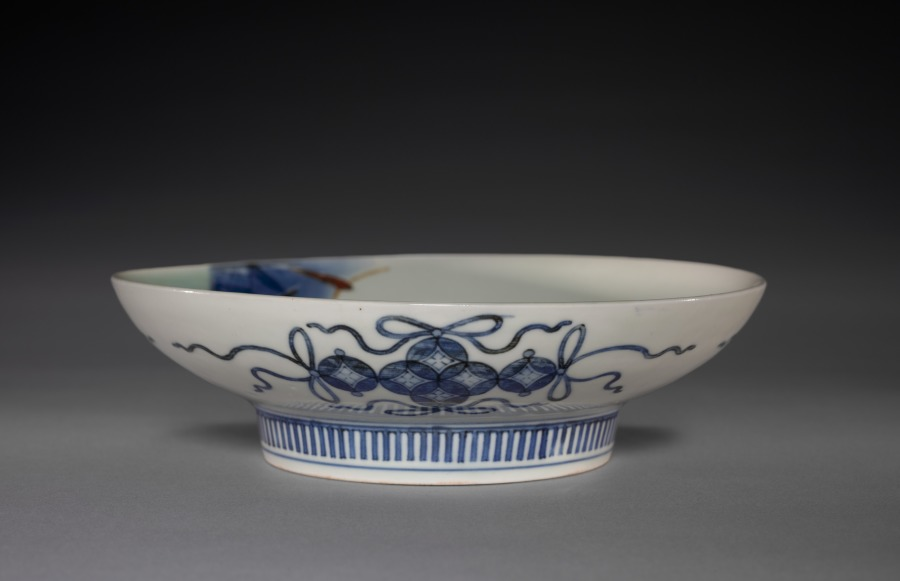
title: Dish with Reeds and Mist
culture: Japan, Edo period (1615–1868)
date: c. 1700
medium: Porcelain with underglaze blue and overglaze color enamel (Hizen ware, Nabeshima type)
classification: Ceramic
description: The interior of this dish features clusters of reeds emerging from mist. The gradation of blue wash in the background suggests that the scene is set by still waters, perhaps the banks of a river or edge of a marsh. The celadon, or pale green glaze, evocative of mist or fog, contrasts visually with the reeds and water.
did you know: Nabeshima dishes were produced in standard sizes of three, five, and seven sun (a traditional measurement of around 3 cm) in diameter.